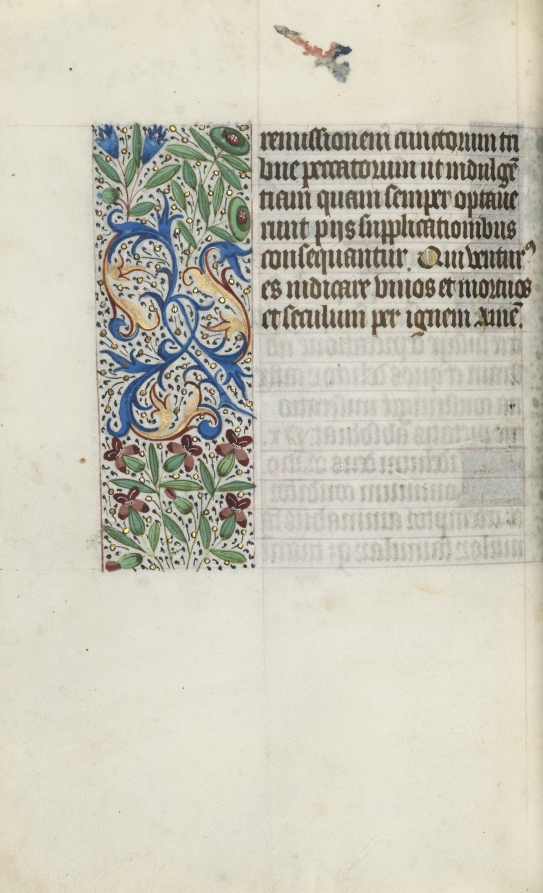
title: Book of Hours (Use of Rouen): fol. 96v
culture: France, Rouen, 15th century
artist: Master of the Geneva Latini (French, active Rouen, 1460–80)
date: c. 1470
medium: ink, tempera, and gold on vellum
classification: Bound Volume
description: In the late 1400s and early 1500s Rouen was an established and important center of book production. The city’s cathedral had a wealthy chapter that spent large sums of money to commission books and to maintain its extensive library. The stationers and booksellers would have likely been concentrated in or near the cathedral precinct. This artist, named after a manuscript now in Geneva, was Rouen’s principal illuminator during the second half of the 1400s.